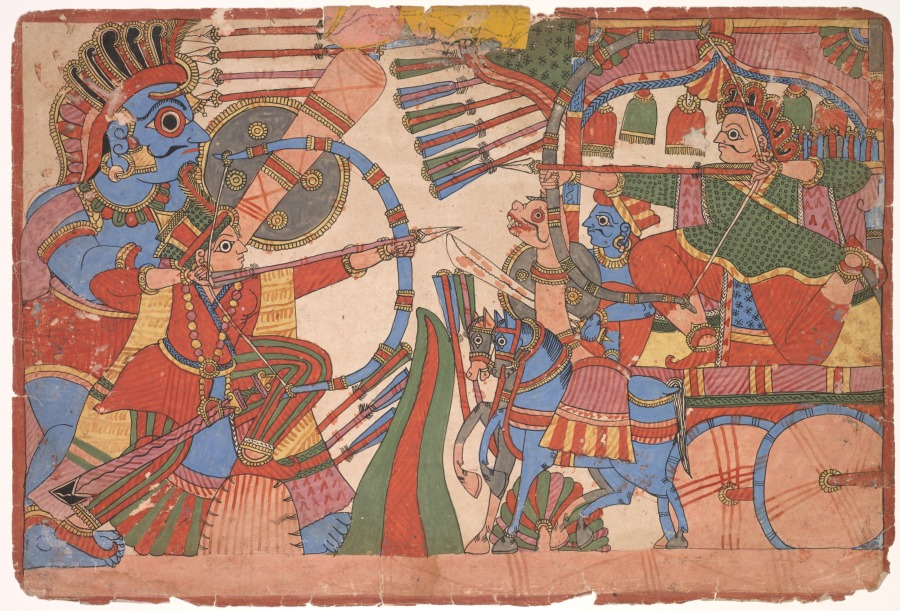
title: Illustration to the Mahabharata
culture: India, Maharashtra, Paithan school, c. 1800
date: c. 1800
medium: ink and gum tempera on paper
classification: Painting